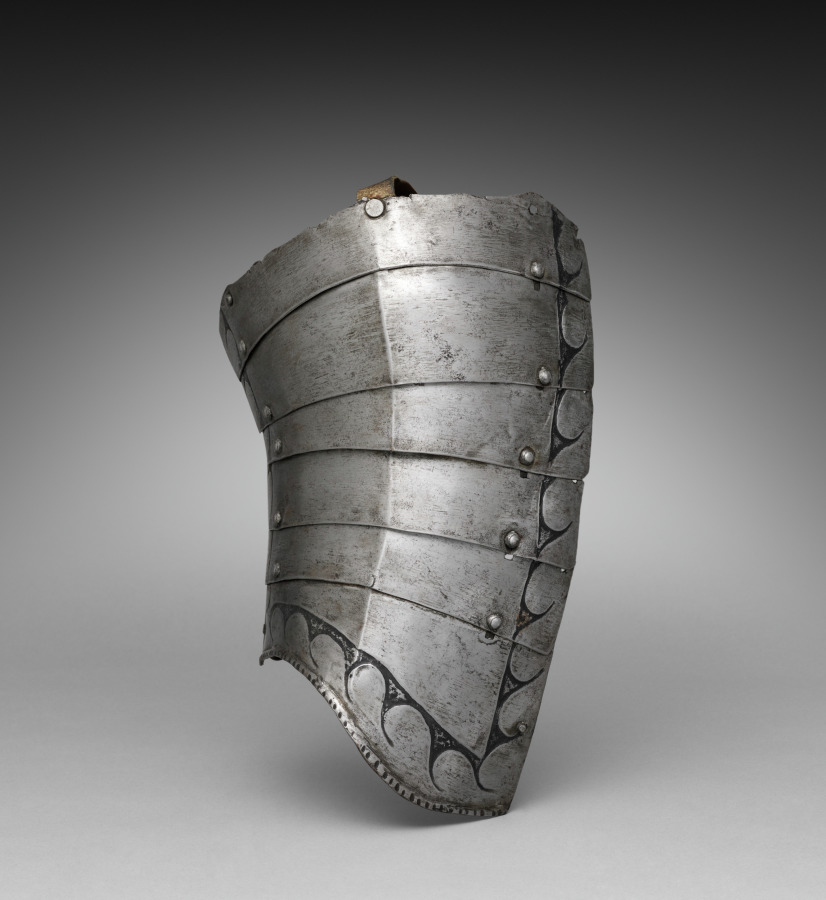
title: Espalier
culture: Germany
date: 1500s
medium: steel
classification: Arms and Armor